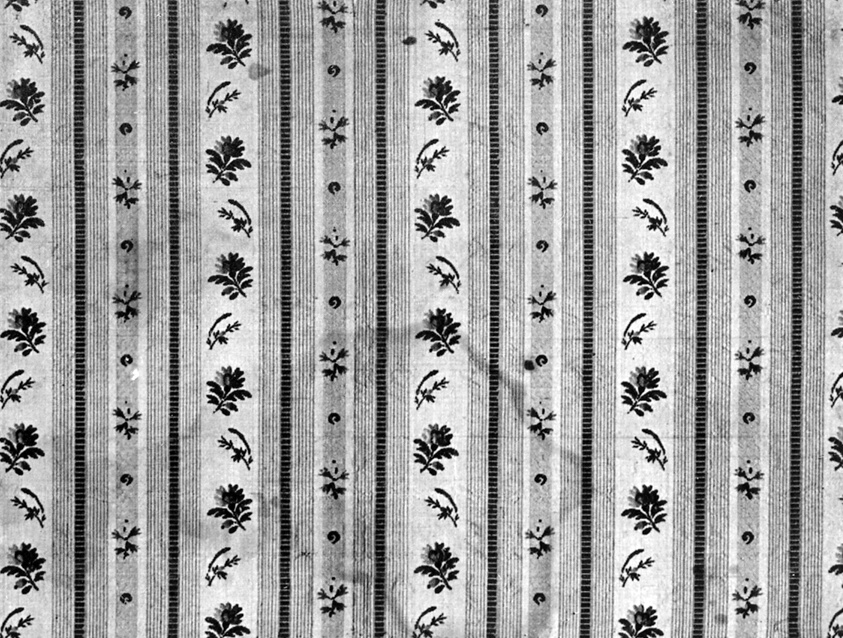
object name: Textile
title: Fragment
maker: France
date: Louis XVI period, 1774–1792, late 18th century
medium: Silk, plain compound cloth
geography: France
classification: textile; weaving